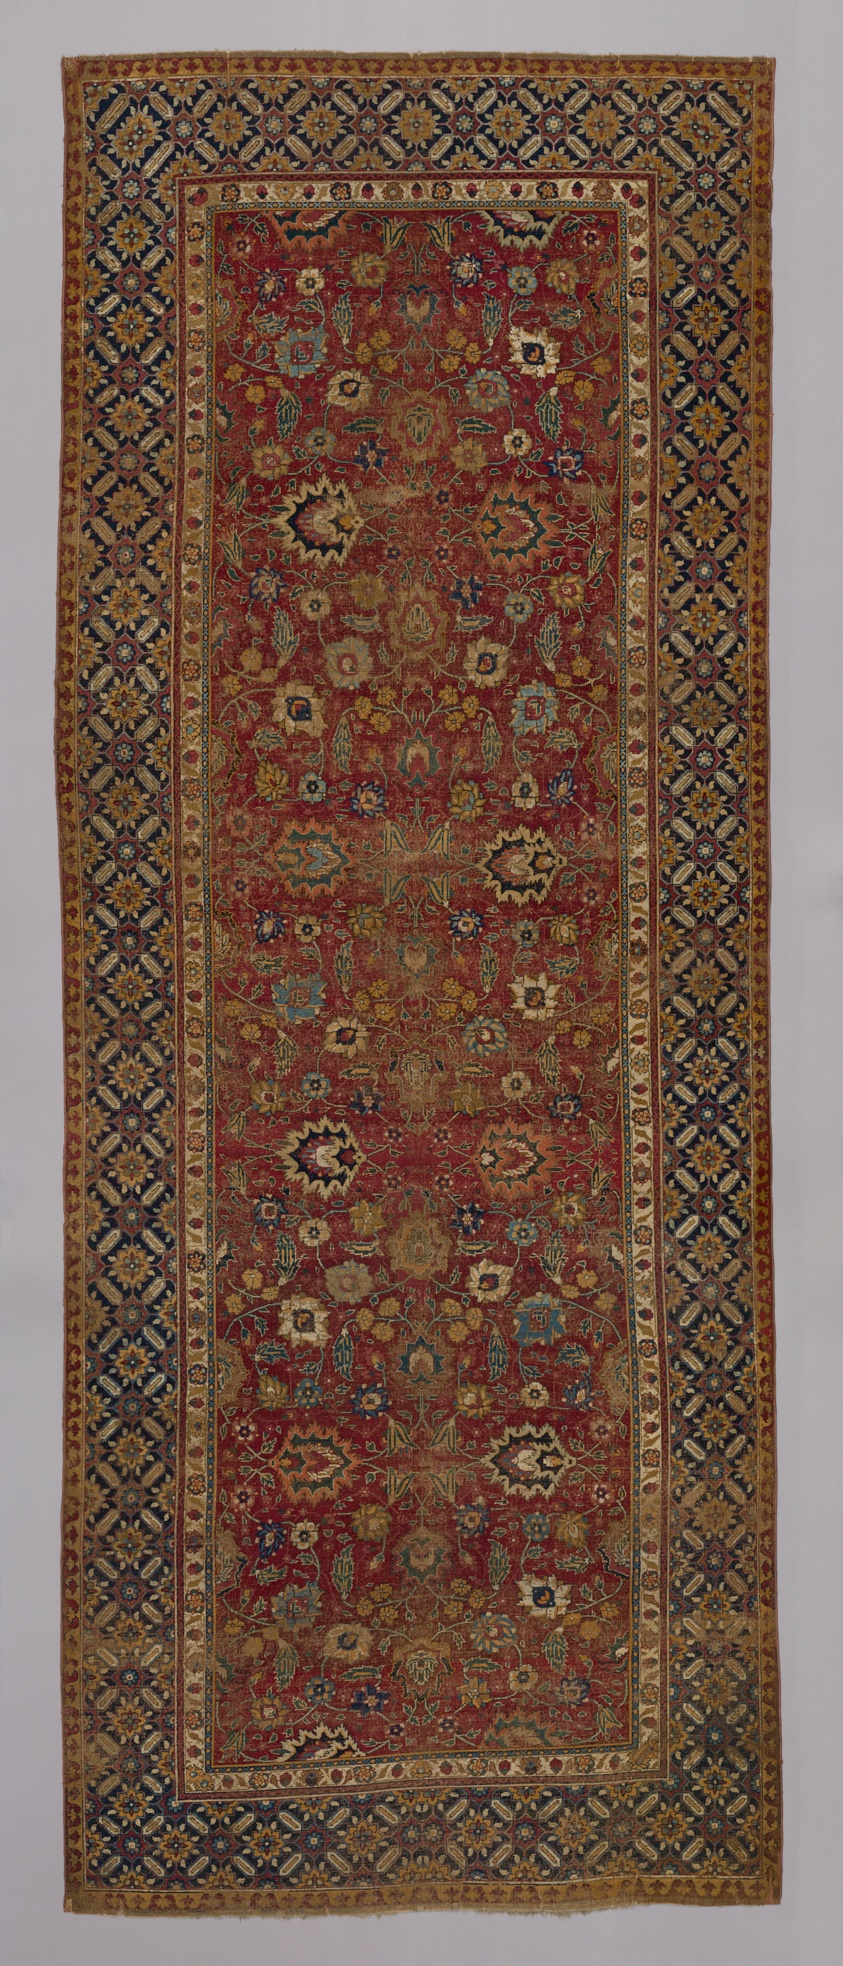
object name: Textile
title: Carpet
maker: India, Lahore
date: Late 17th century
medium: Cotton and wool, plain weave variation with supplementary wrapping wefts forming cut pile through a technique known as "Persian" (Sehna) knots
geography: Lahore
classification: textile; weaving - carpet; weaving